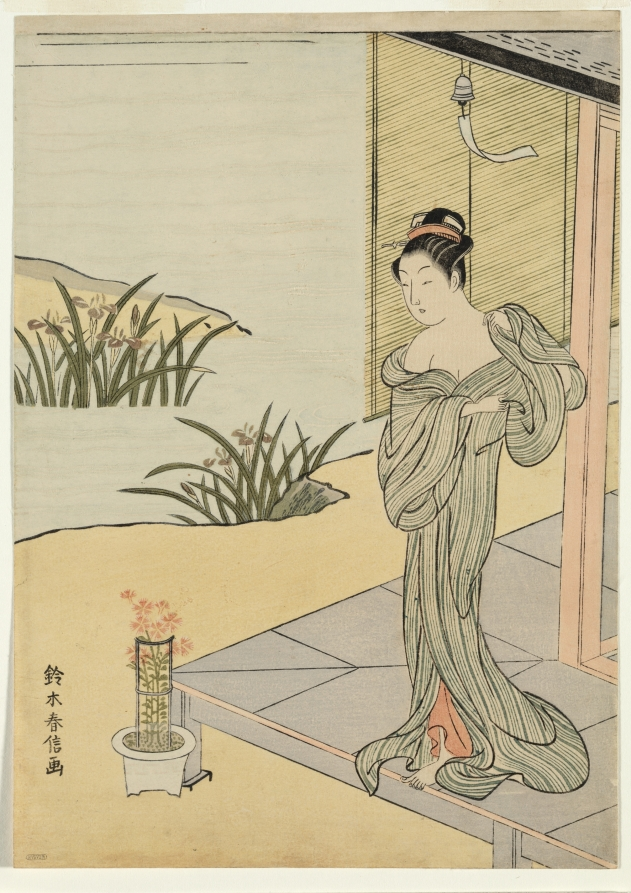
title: Young Woman Looking at a Pot of Pinks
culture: Japan, Edo period (1615–1868)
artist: Suzuki Harunobu (Japanese, 1724–1770)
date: c. 1767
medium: color woodblock print, with embossing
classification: Print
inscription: Signature: Suzuki Harunobu ga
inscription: Collector's Seal: Vever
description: A girl steps onto a veranda after a bath to look at a pot of pinks. A warm breeze stirs the poem-strip tied to the windbell above her. Irises bloom in the pool in the background. The print has been identified as the summer subject in a set of four flowers representing each season and is considered to be one of Harunobu’s most enchanting designs. One of the most celebrated and productive of all ukiyo-e artists, Harunobu is widely recognized as the first Japanese printmaker to create designs by printing each color in the image with a different block. These prints came to be known as nishiki-e, or brocade pictures, suggesting their resemblance to the gorgeous brocades worn at the time. The embossing on the waves in the stream and on the flowers was created by using unpigmented blocks during the printing process.